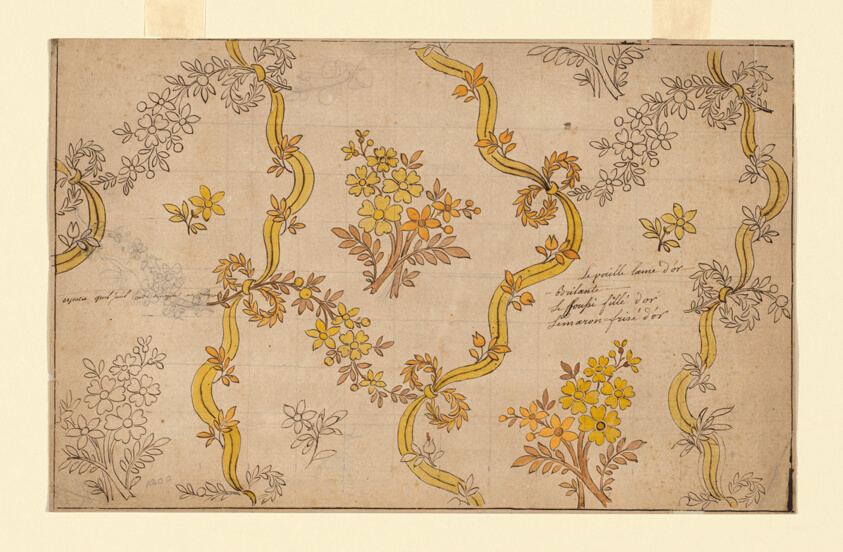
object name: Textile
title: Design for an Embroidered or Woven Textile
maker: France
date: 19th century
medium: Design on paper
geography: France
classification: textile; accessory - paper design; accessories (object genre)